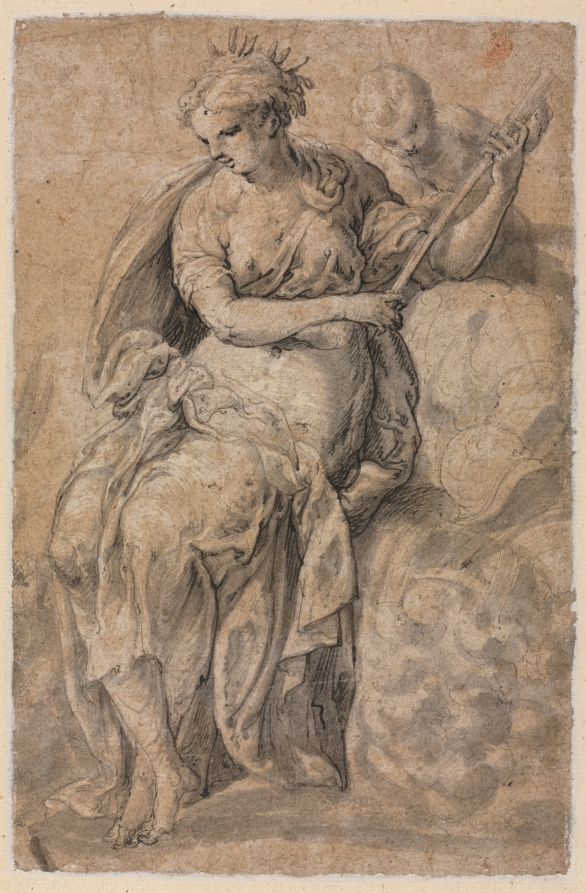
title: Allegorical Figure (verso)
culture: Italy, 16th century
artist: Niccolo dell' Abbate (Italian, c. 1512–1571)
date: 1500s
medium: pen and black ink and brush and gray wash, heightened with white gouache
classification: Drawing